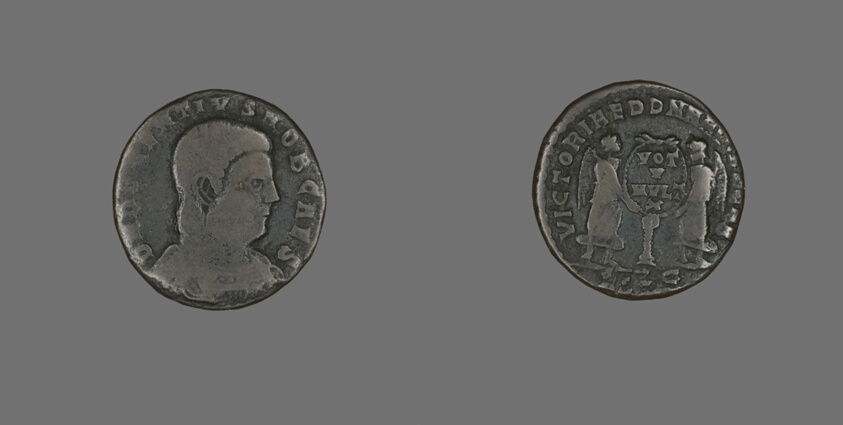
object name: Coin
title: Coin Portraying Emperor Decentius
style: roman (ancient, style or period), ancient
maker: Roman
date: 351-353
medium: Bronze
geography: Roman Empire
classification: coin; ancient art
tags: goddesses